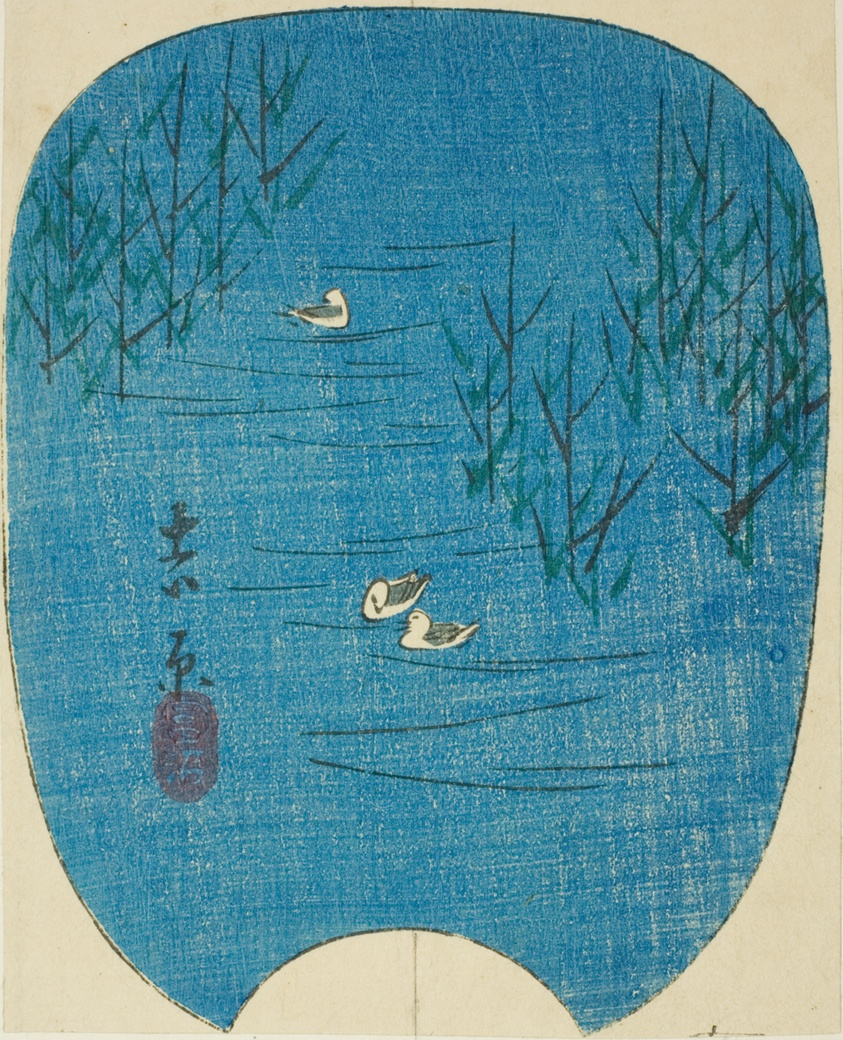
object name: Print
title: Fuji Marsh in Yoshiwara (Fujinuma, Yoshiwara), section of sheet no. 4 from the series "Pictures of the Fifty-three Stations of the Tokaido (Tokaido gojusan tsugi zue)"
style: Japanese (culture or style)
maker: Utagawa Hiroshige 歌川 広重; Japanese, 1797-1858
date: 1856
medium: Color woodblock print; section of harimaze sheet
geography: Japan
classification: woodblock print; print; asian art